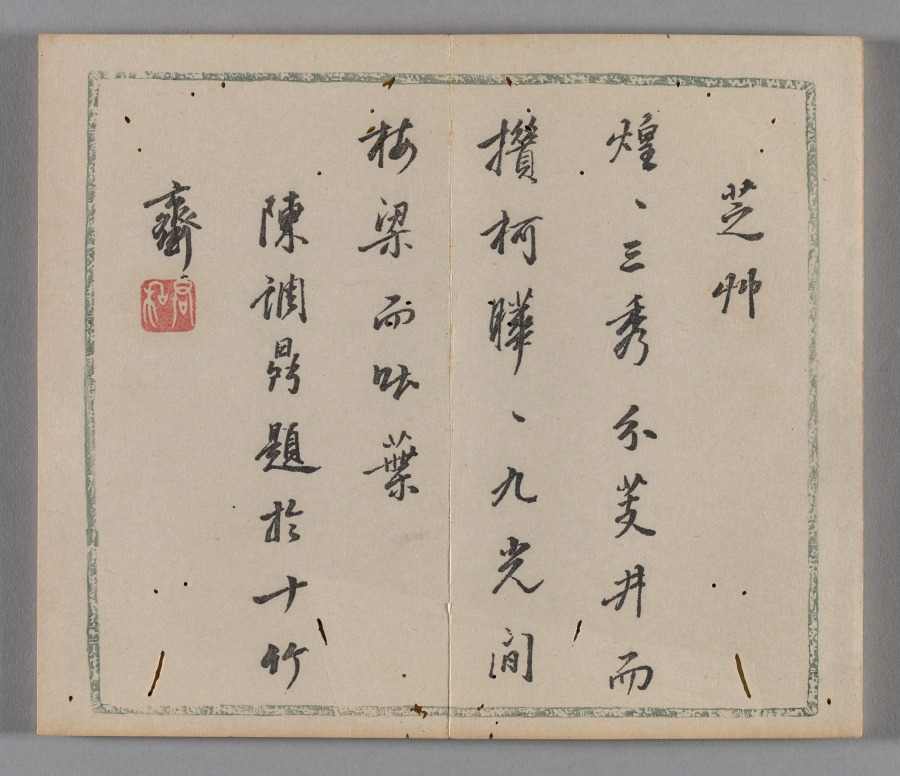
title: Ten Bamboo Studio Collection of Calligraphy and Painting: Round Fans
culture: China, Qing dynasty (1644-1911)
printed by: Hu Zhengyan (Chinese, c. 1584–1674)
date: 1633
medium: Woodblock-printed book; ink and colors on paper; first edition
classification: Print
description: Color printing reached a level of perfection in the early 1600s, as seen in this Ten Bamboo Studio Collection of Calligraphy and Painting and the Mustard Seed Garden Manual of Painting (printed 1679 and 1701). The painterly quality, precision in registering (aligning) the woodblocks, and harmonious colors made them the most successful color print editions in Chinese history. Both editions were printed and compiled in Nanjing, spread nationwide, and had a great impact on the arts in Japan and Korea.